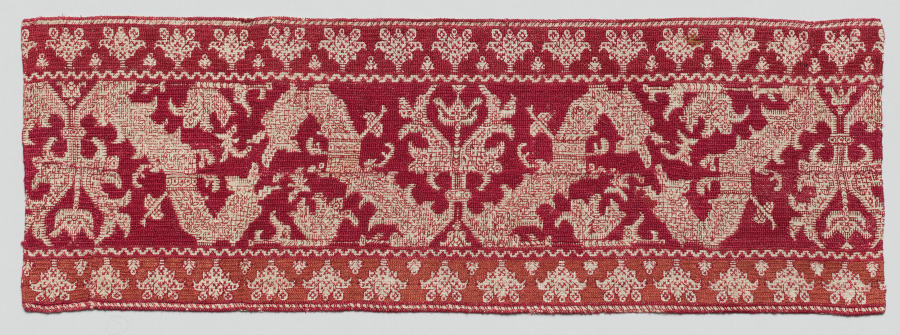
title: Fragment of a furnishing textile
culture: Africa, North Africa, Morocco, Azemmour, Moroccan embroiderer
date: possibly 1700s or 1800s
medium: Linen, silk, and dye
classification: Embroidery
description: Small bands like this decorated furnishings. They are distinctive to Azemmour, Morocco, where Jewish women embroidered them at home. This band’s red designs are floral and geometric; the scrolls may be abstracted dragons. Its Renaissance-era motifs reflect centuries of cross-Mediterranean exchange (especially with Portugal, which ruled Azemmour from 1513 to 1541). Such designs traveled to North Africa via printed pattern books. Patterns were transferred onto fabric, then the backgrounds were covered with filling stitches: plait and cross-stitches were used here. The production of these embroideries ceased around the mid-1900s because of cost and changing fashions.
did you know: This textile represents the work of at least four individuals: the person who prepares the fibers, the weaver, the dyer, and the embroiderer.